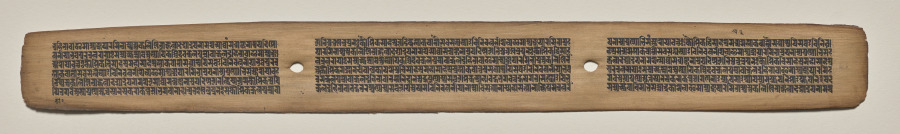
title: Text, Folio 47 (recto), from a Manuscript of the Perfection of Wisdom in Eight Thousand Lines (Ashtasahasrika Prajnaparamita-sutra)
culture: Eastern India, Bihar, Vikramashila Monastery. Painting: Nepal, Kathmandu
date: Sunday, September 14, 1119 (year 239 of the Newar Samvat in the month of Ashvina)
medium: gum tempera and ink on palm leaves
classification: Painting